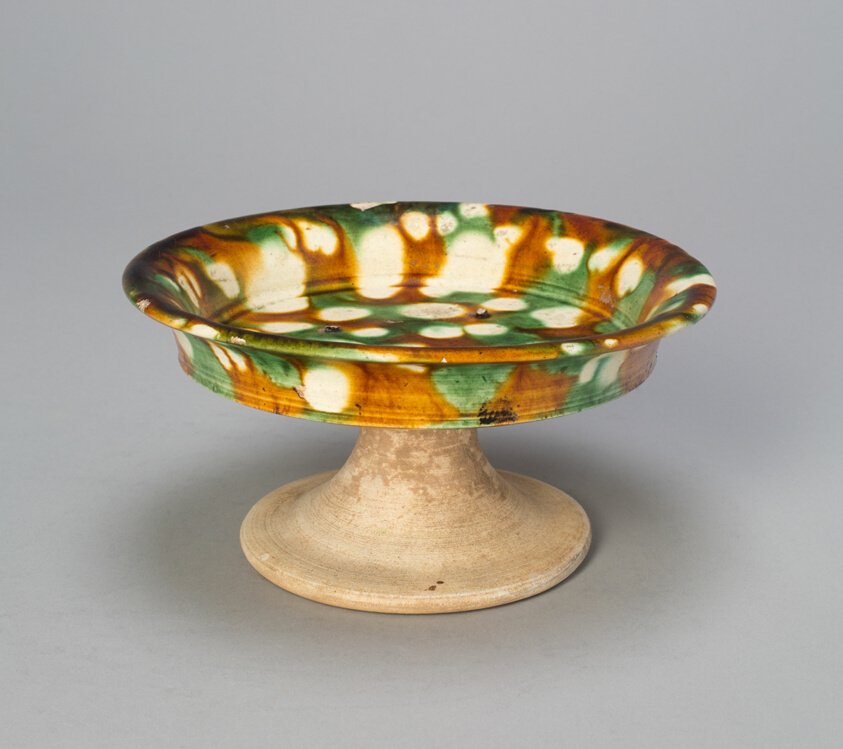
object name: Vessel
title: Pedestalled Dish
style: Chinese (culture or style)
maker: China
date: Tang dynasty (618–906), 8th century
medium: Earthenware with three color (sancai) lead glazes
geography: China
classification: dish (vessel); earthenware; asian art; ceramics; vessel